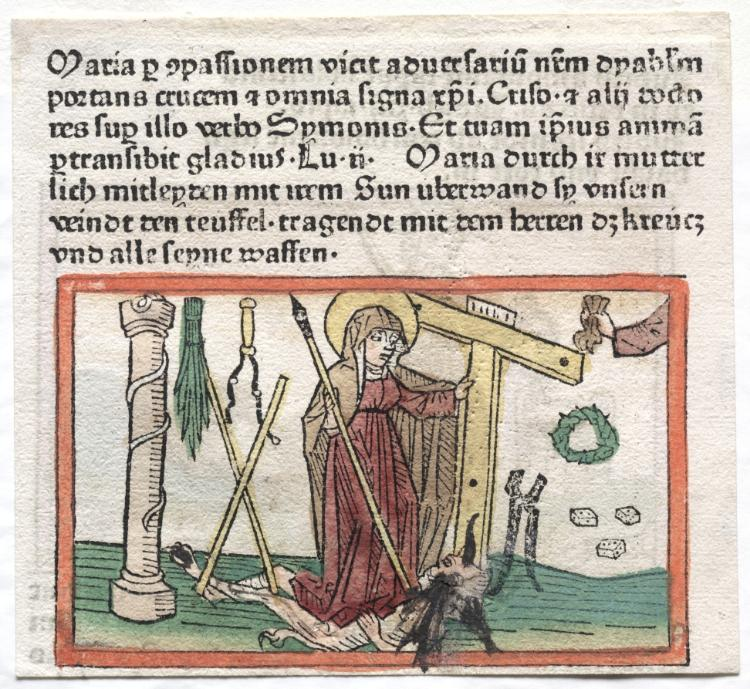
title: Spiegel Menslicher Behaltnis: The Virgin Mary Overcoming a Devil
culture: Germany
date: 1400s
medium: woodcut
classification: Print